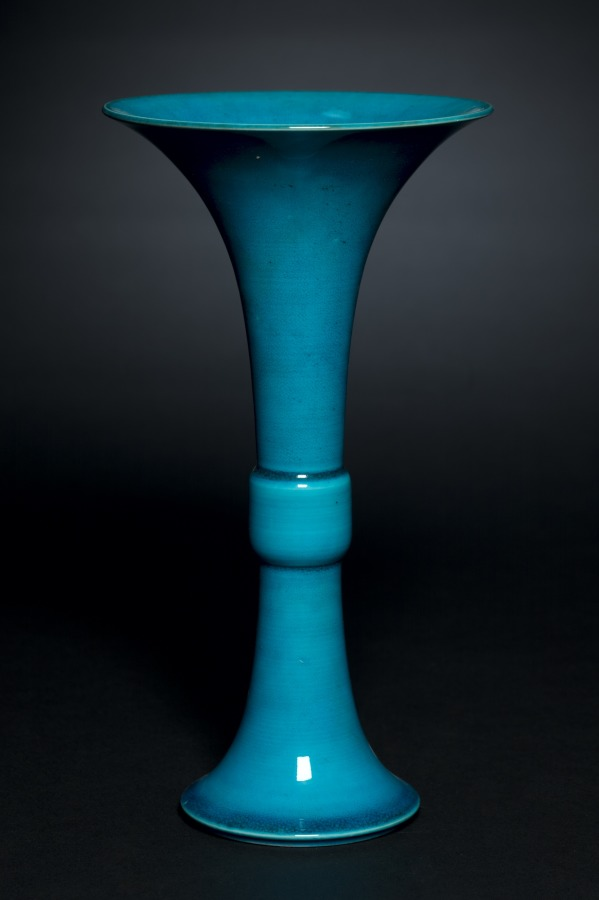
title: Pair of Beaker Vases in Form of Archaic Gu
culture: China, Jiangxi province, Jingdezhen kilns, Qing dynasty (1644–1911), Kangxi mark and reign (1662–1722)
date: 1662–1722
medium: porcelain with peacock-blue glaze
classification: Ceramic